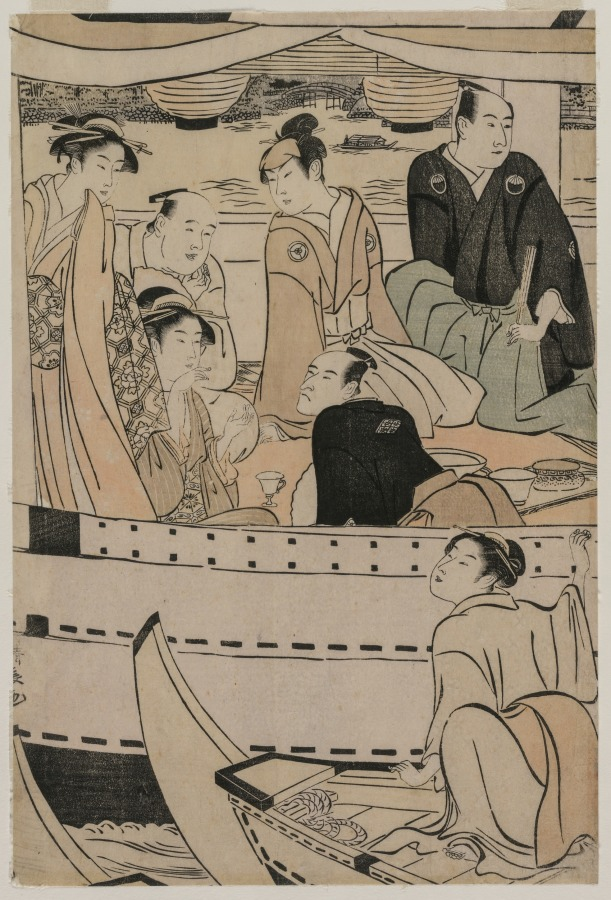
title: Boating Party on the Sumida River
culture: Japan, Edo period (1615–1868)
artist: Torii Kiyonaga (Japanese, 1752–1815)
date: 1789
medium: One of a triptych of color woodblock prints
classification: Print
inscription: Signature: Kiyonaga ga Publisher: Tsuruya Kihei (?) (emblem on lanters)